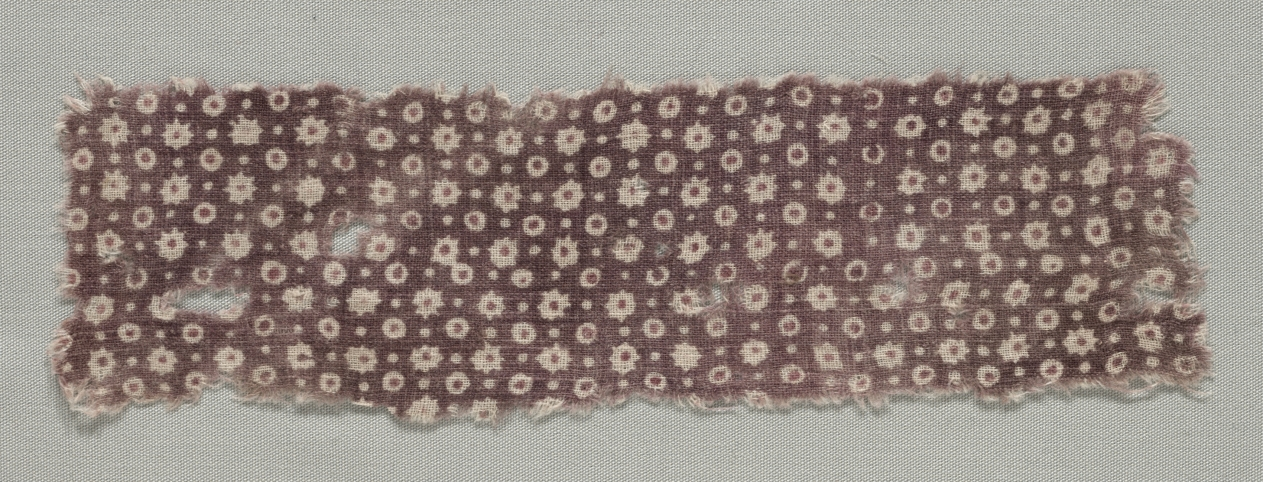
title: Fragment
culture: India, 12th-14th century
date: 1100s - 1300s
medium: plain cloth, resist dyed; cotton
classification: Textile